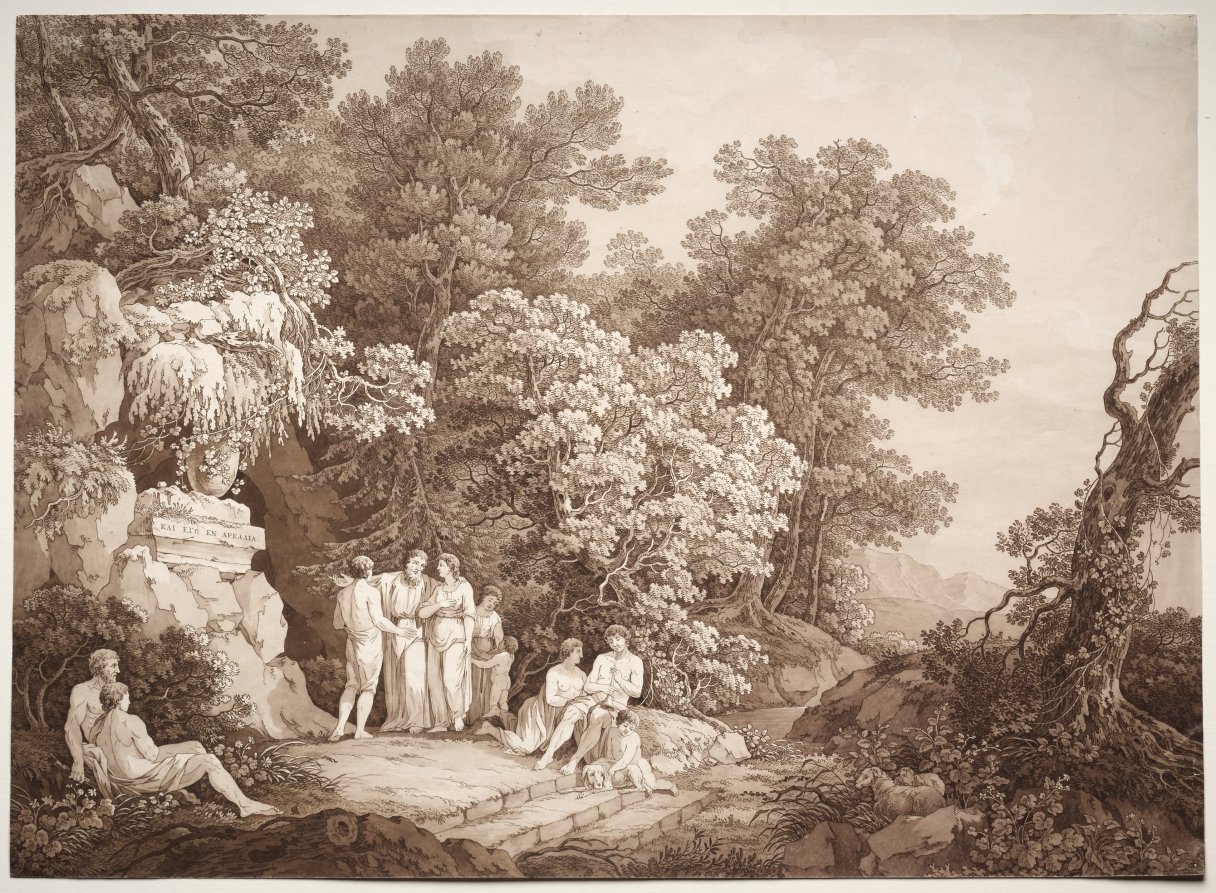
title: I was also in Arcadia (Kai ego en Arkadia)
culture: Switzerland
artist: circle of Adrian Zingg (Swiss, 1734–1816)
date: 1789–1790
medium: etching hand-colored with wash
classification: Print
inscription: verso, pen and brown ink: Auch ich war in Arcadian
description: A Swiss etcher and draftsman primarily active in Germany, Adrian Zingg was esteemed as one of the most important landscapists of his generation. This Arcadian view—a technical marvel combining line etching with delicate washes of brown—is a superb example of the German Romantic landscape in which contemplative, idealized figures meditate and converse in a meticulously rendered wooded grove. It is thought that Zingg executed the etching and members of his workshop completed the hand coloring, following one of Zingg’s drawings.